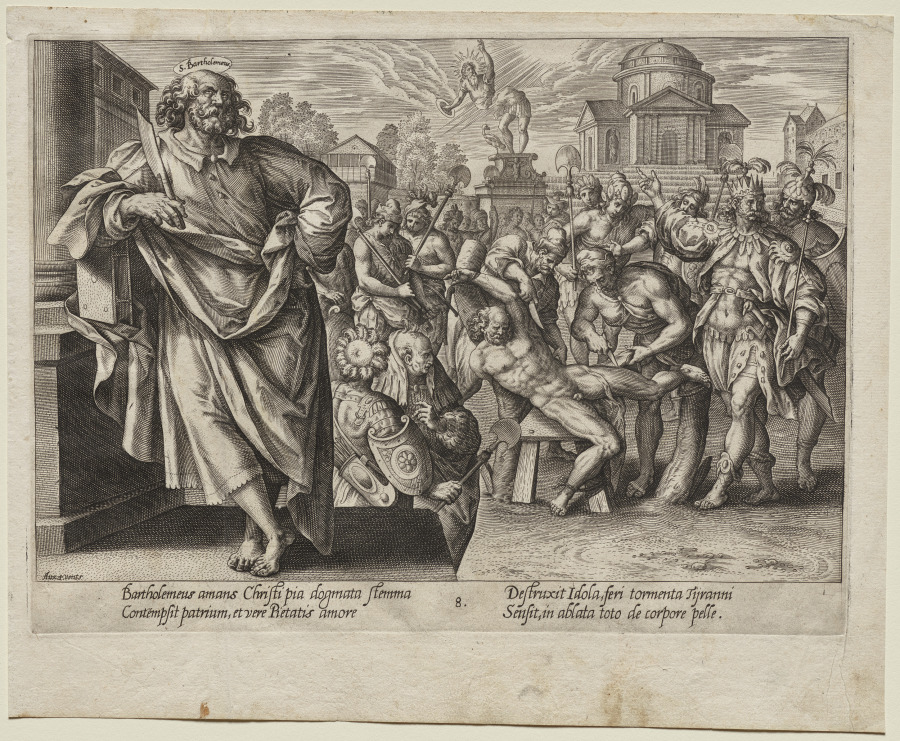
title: St. Bartholomew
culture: Netherlands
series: Christ, St. Paul, and the Twelve Apostles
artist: Hendrick Goltzius (Dutch, 1558–1617)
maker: after Maarten de Vos (Flemish, 1532–1603)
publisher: Aux Quatre Vents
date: c. 1578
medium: engraving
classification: Print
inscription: Aux.4.vents. (4 in reverse) lower left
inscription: Verses in lower margin: Bartholomeus amans…corpore pelle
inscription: In nimbus: S. Bartholemeus. Numbered 8